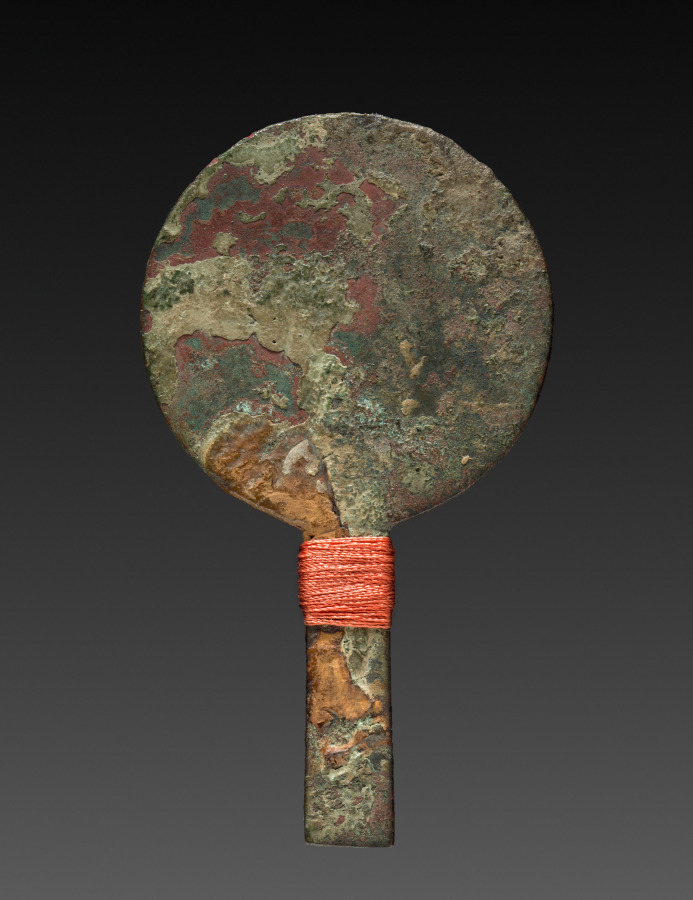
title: Mirror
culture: Japan, Edo period (1615–1868)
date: 1615–1868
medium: bronze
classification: Metalwork